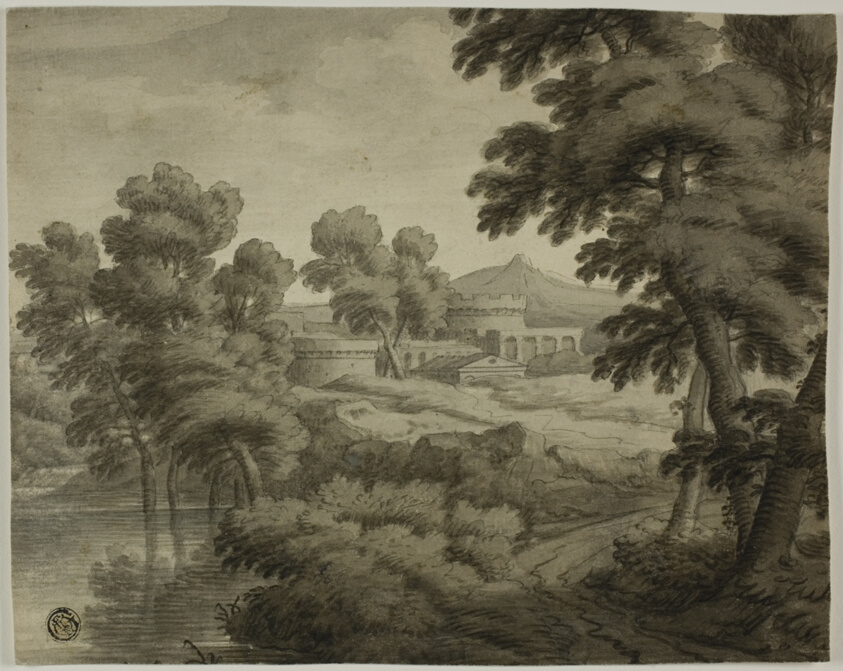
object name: Drawing and Watercolor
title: Italianate Landscape with Castle, Trees and Water in Foreground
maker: School of Nicolas Poussin (French, 1594-1665)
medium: Pen and black ink and brush and black and gray wash, over black chalk, on cream laid paper, laid down on ivory laid paper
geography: France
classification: ink or chalk wash; drawings (visual works); prints and drawing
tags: landscapes